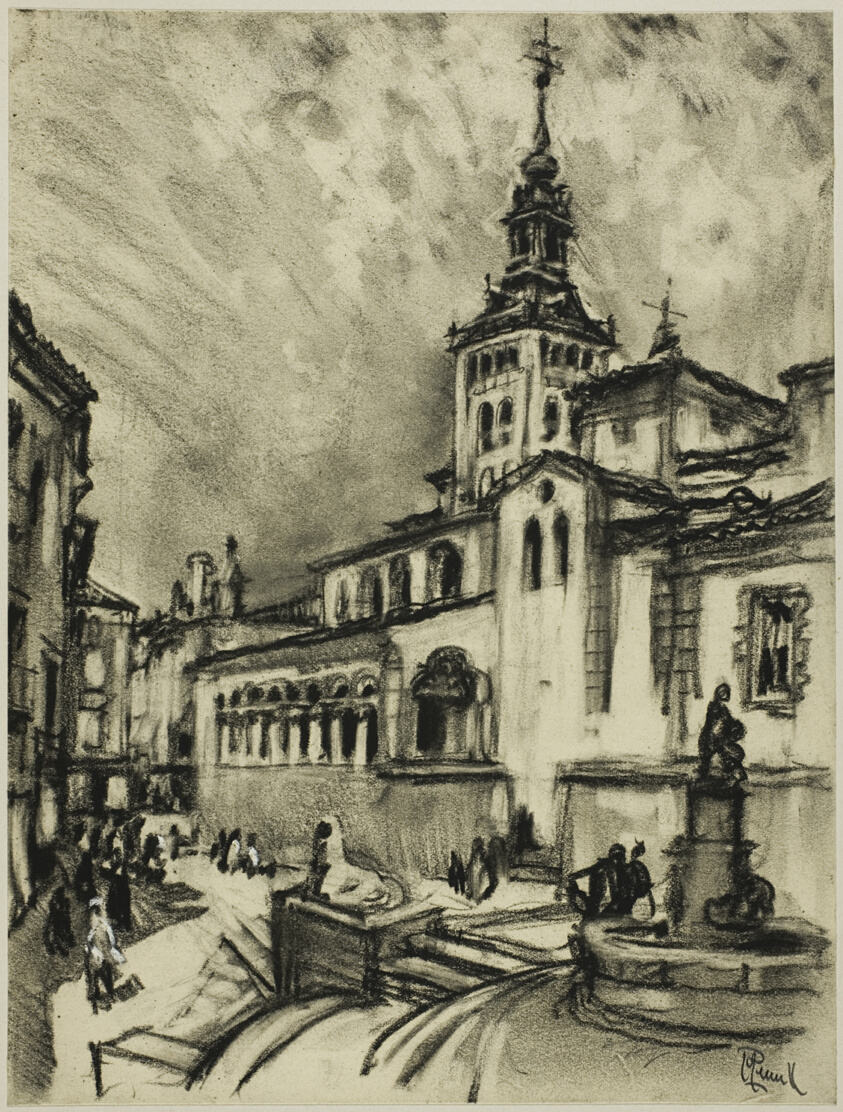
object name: Drawing and Watercolor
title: San Martín, Segovia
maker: Joseph Pennell (American, 1857-1926)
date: c. 1903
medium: Oiled charcoal with stumping and erasing, heightened with touches of white chalk, on cream wove paper, perimeter mounted on off-white wood pulp laminate board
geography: United States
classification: charcoal; drawings (visual works); prints and drawing